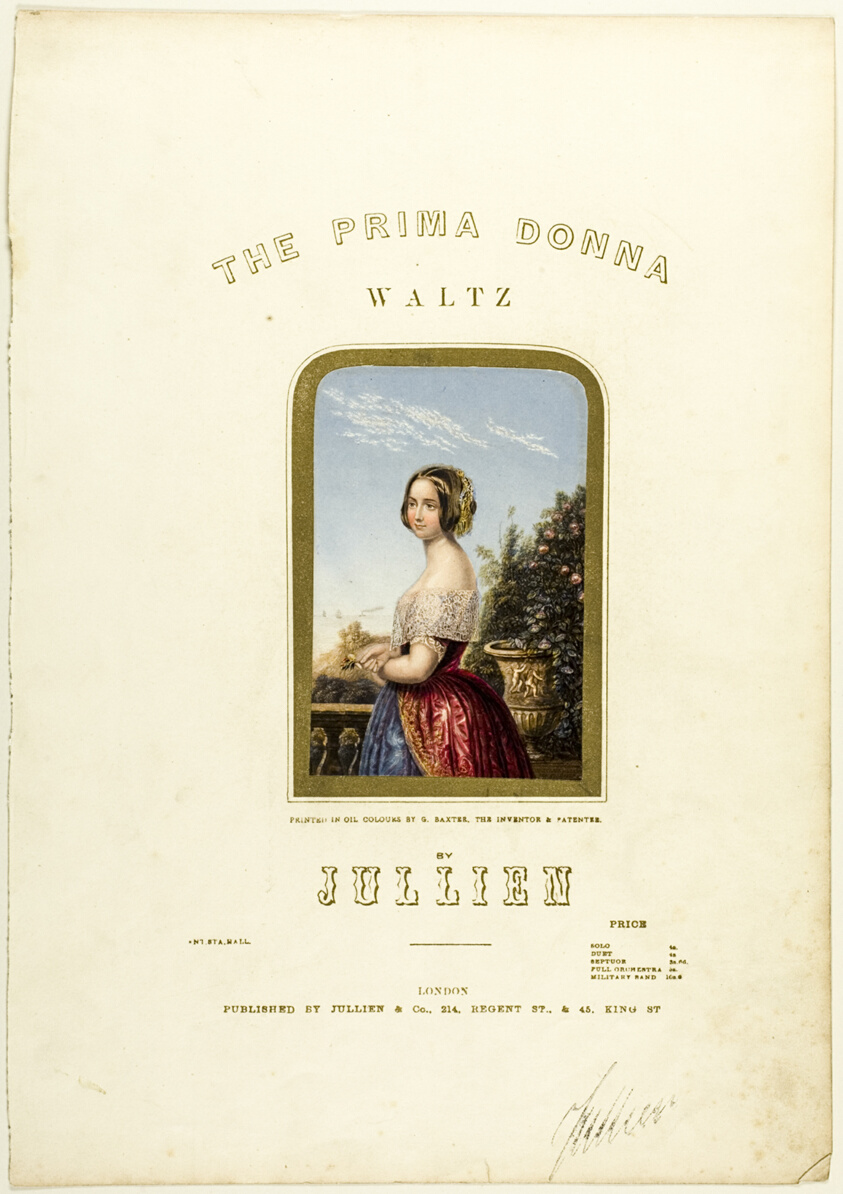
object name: Print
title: The Bride, cover for The Prima Donna Waltz sheet music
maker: Baxter, George; English, 1804-1867; composed by Louis Jullien (French, 1812-1860)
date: 1850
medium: Steel engraving colored with wooden blocks on ivory wove paper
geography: England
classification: wood engraving; print; prints and drawing